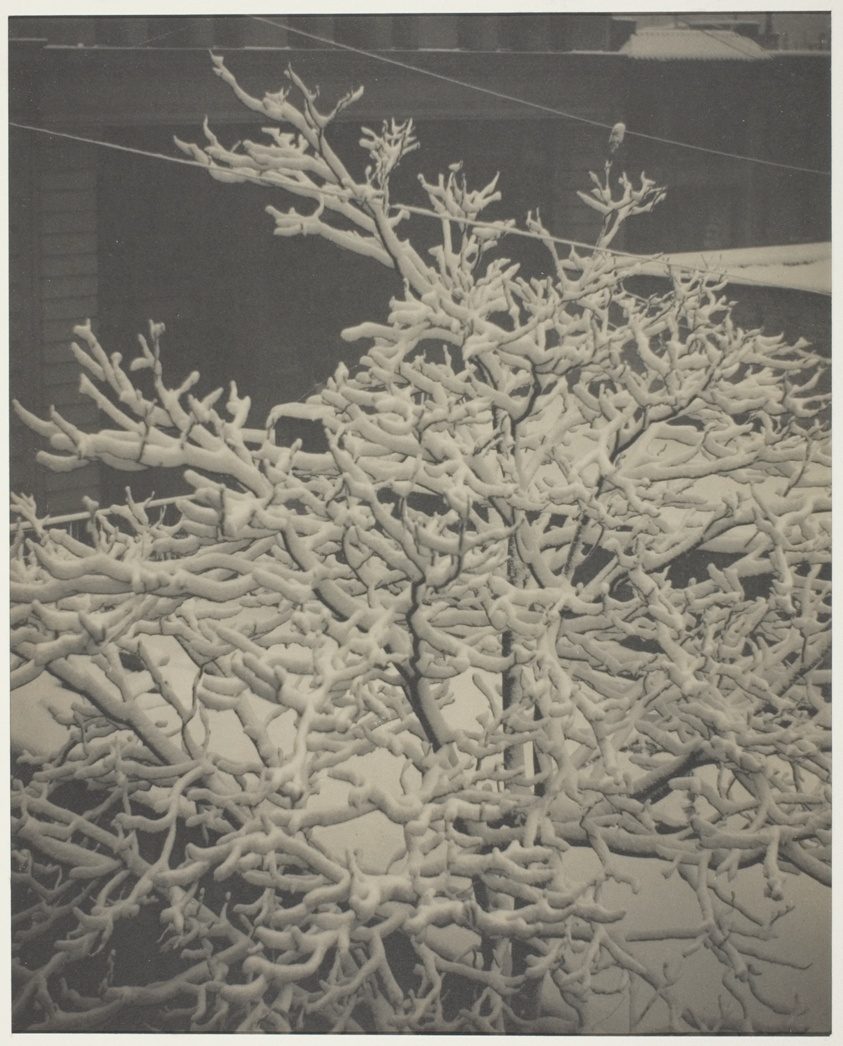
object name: Photograph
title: From the Back-Window "291" Snow-Covered Tree, Back-Yard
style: Pictorialism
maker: Alfred Stieglitz (American, 1864–1946)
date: 1915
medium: Platinum print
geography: United States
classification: platinum print; photographic process; photography; photograph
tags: winter, cityscapes